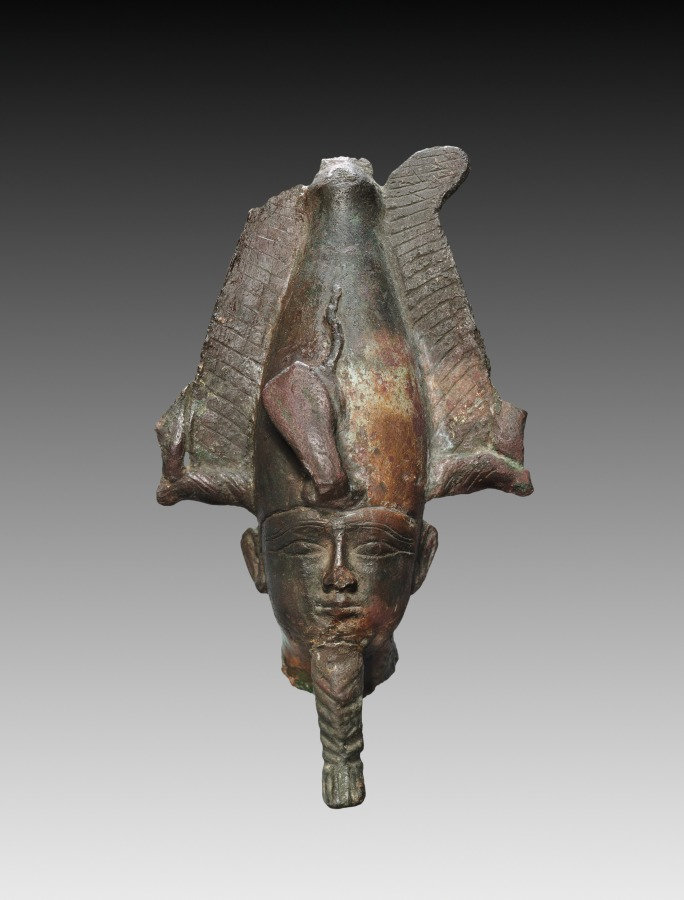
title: Head of Osiris and Statuette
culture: Egypt, Late period (715–332 BCE), Dynasty 26 or later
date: 664–525 BCE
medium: bronze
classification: Sculpture